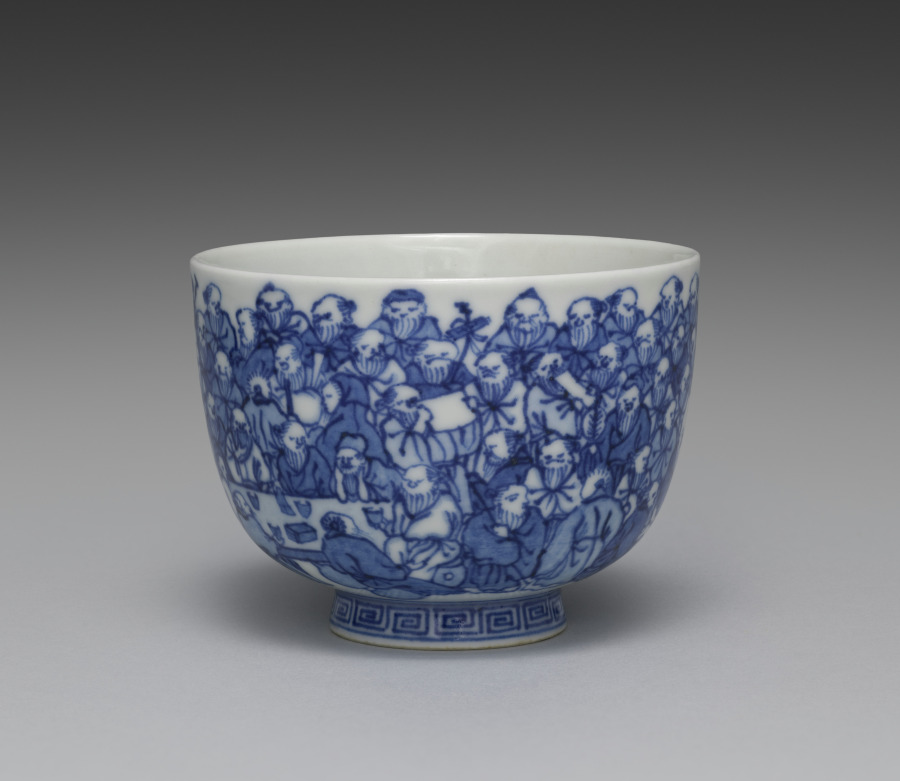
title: Teacup from Teacups with a Hundred Sages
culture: Japan, Meiji period (1868–1912)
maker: Seifū Yohei III (Japanese, 1851–1914)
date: 1893–1914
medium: One from a set of five teacups; porcelain with underglaze blue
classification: Ceramic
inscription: 清風造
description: Each of these five teacups has a painting of identical design in underglaze blue, but as the tiny figures are drawn entirely by hand, each cup has its own personality. The theme of the sencha cups is an assembly of sages or immortals, literally “a hundred venerable [people]” (hyakurō). The myriad figures crowd the scene in groups. The god of longevity, with his tall forehead, sits with his cranes, having flown in from Mt. Penglai on the Isle of the Immortals. Seven long-bearded sages sit around a stone table, chatting and drinking; one is seated on an enormous gourd. Of course, there is a stack of books on the table, and elsewhere, scrolls are being written upon or read—in one case held very close by a sage who is wearing glasses. The design was enormously popular in ceramics made for those engaged in literati culture.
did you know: Seifū Yohei III (1851–1914) produced many works for tea gatherings where people drank Chinese-style leaf-tea (sencha).